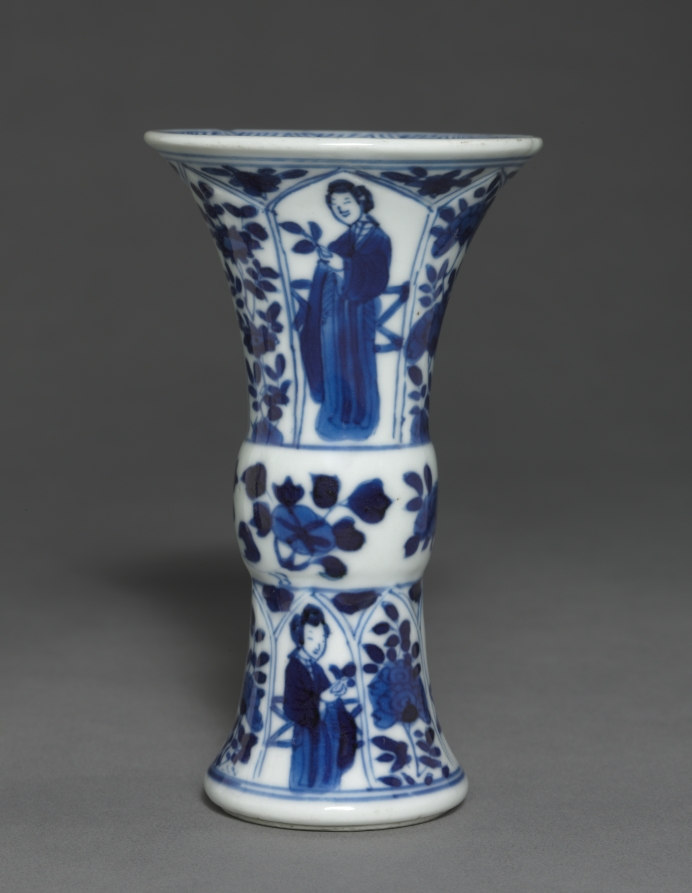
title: Beaker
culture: China, Qing dynasty (1644-1911), Daoguang reign (1821-1850) - Xianfeng reign (1851-1861)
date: 19th Century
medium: porcelain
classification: Ceramic